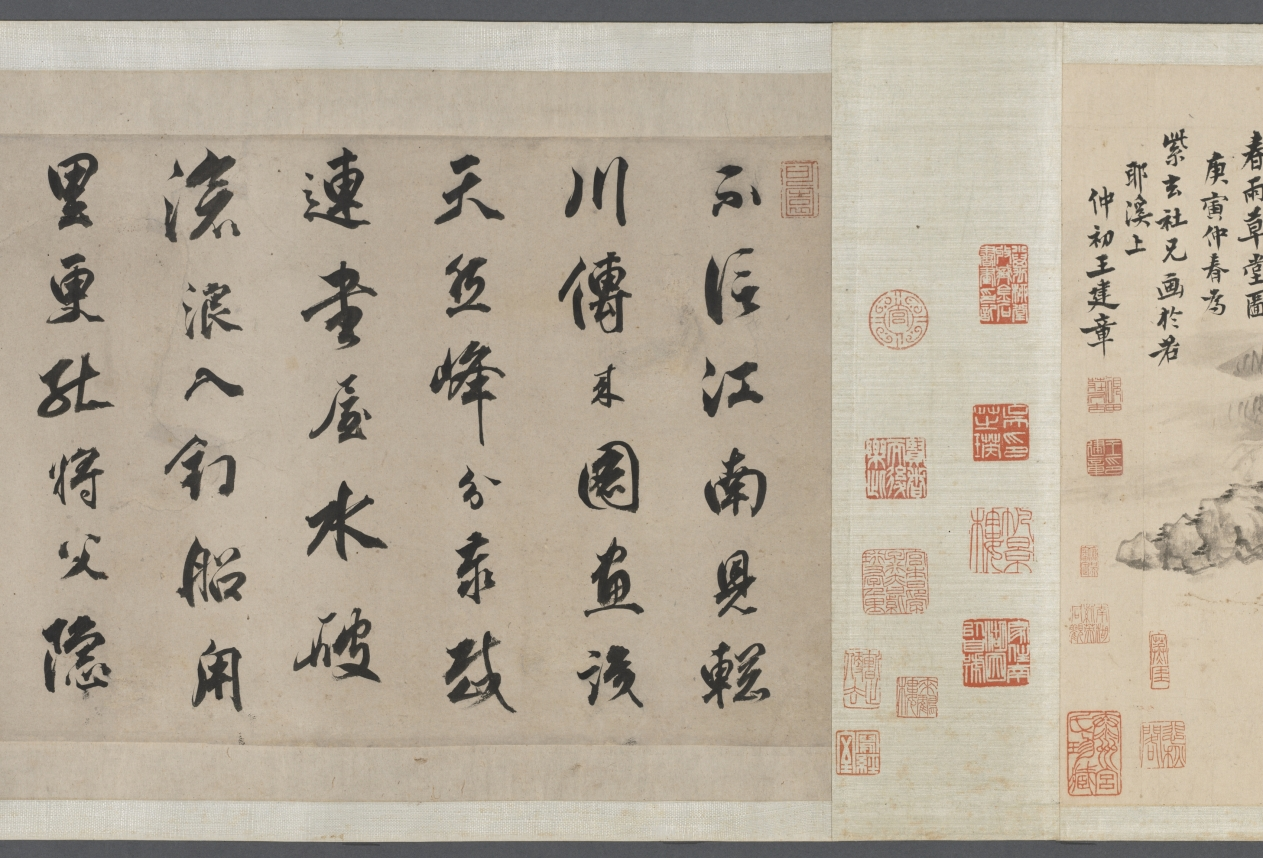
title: Spring Rain Thatched Hut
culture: China, Qing dynasty (1644-1911)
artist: Wang Jianzhang (Chinese, active 1621–1662)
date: 1650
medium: handscroll, ink on paper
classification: Drawing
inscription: Title by Wu Zhiying 吳芝瑛 (1868–1933), dated 1910.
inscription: 春雨草堂圖。庚寅仲春，為紫玄社兄畫於若耶溪上。 仲初王建章。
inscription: 12 colophons by Gong Weiliu’s 宮偉鏐 (1611–1680) contemporaries: Fang Gongqian 方拱乾 (1596–1667, jinshi of 1628); Jiang Cai 姜埰 (1607–1673); Liang Yizhang 梁以樟 (1608–1665); Du Shaokai 杜紹凱 (also named Du Jie 杜岕, 1617–after 1689), dated 1648; Zhao Kaixin 趙開心 (d. 1663), dated 1647; Zhao Erbian 趙而忭 (d. 1658); Yu Yaoguang 余耀光, dated 1649; Yao Quan 姚佺, dated 1648; Chen Taisun 陳台孫 (b. 1611, jinshi of 1640); (Monk) Shao 韶; Du Zhujin 杜祝進; and Tang Shi 唐時.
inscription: 此研田莊居士王建章為先太史紫元公所作春雨草堂圖也。居士字仲初，明崇禎間人，與先太史及惲香山相友善。喜畫佛像，自謂不讓李公麟。山水祖述董源，筆力雄健，有不可羈勒之概。香山稱其墨有五采，非世人所知。然性廉重，非同志不輕落筆，人得其寸圖尺縑，必相與忻賞，如獲蜼彝兕敦，非人世間物也！見先太史筆記，此圖寫雨景，而氣韻生動，勃勃於不能止。每一展覽，覺滿紙雲烟，墨瀋猶濕，如寫吾先人胸中未盡之邱壑也。圖後題詠，多一時名手，想見文采風流之盛。迄今二百餘年，舊德先疇，遺風未沫。吾子孫其永寶之，如與吾先人接謦咳於一堂，為感思之助，其敢作圖畫觀乎！同時香山亦有圖佚去己久，不知異日能為延津之合否。壬申長夏本昂重裝敬識。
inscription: Collectors' seals including: Gong Ben'ang 宮本昂 (1821–1874); Lian Qian 廉泉 (1868–1932); Wu Zhiying 吳芝瑛 (1868–1933)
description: With its striking simplicity, this painting captures the pure serenity of a private garden in the moist atmosphere of a spring morning on a small river. Painted in the style of Ni Zan, Wang Jianzhang dedicated this work to his patron-friend Gong Weiliu (1611-1680). Gong retired from government service after the fall of the Ming dynasty and constructed a garden-retreat at his native home in Taizhou, Jiangsu province. He invited scholars and poets from his literary society to contribute writings of his estate, which are here mounted together with the painting in this scroll.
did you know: Gong Weiliu, the owner of the estate portrayed here, had received his prestigious jinshi degree in 1643, but his official career was thwarted by the collapse of the Ming dynasty the following year.